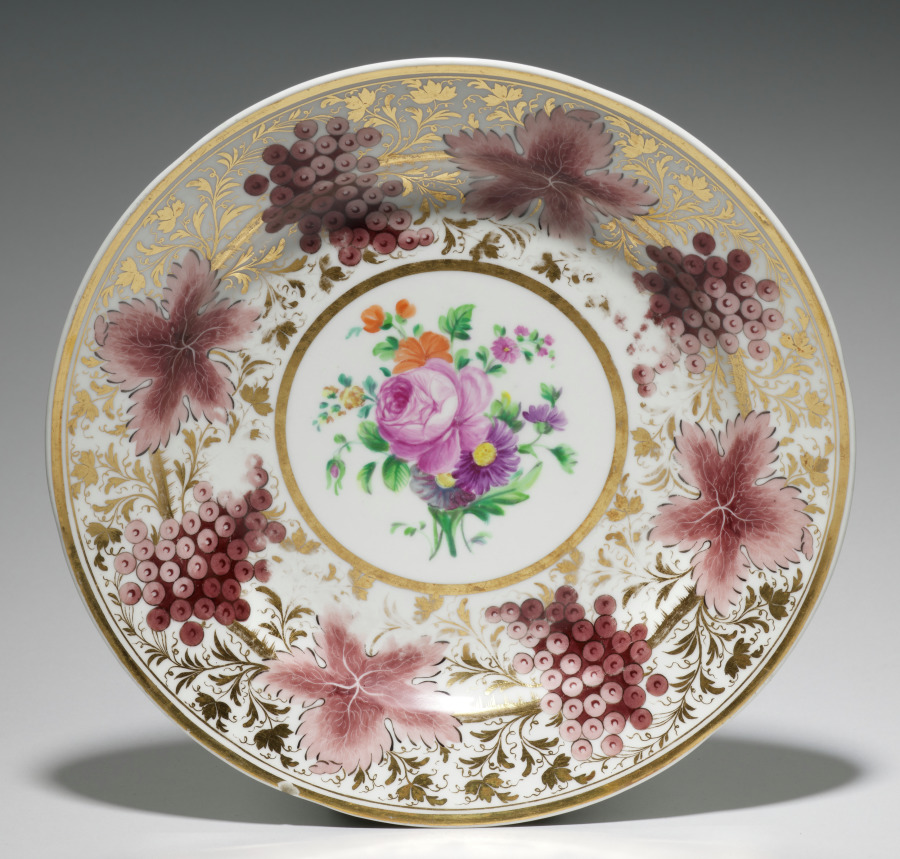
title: Plate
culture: Russia, St. Petersburg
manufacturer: St. Petersburg Imperial Porcelain Factory (Russian)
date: 1825–1855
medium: porcelain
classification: Ceramic